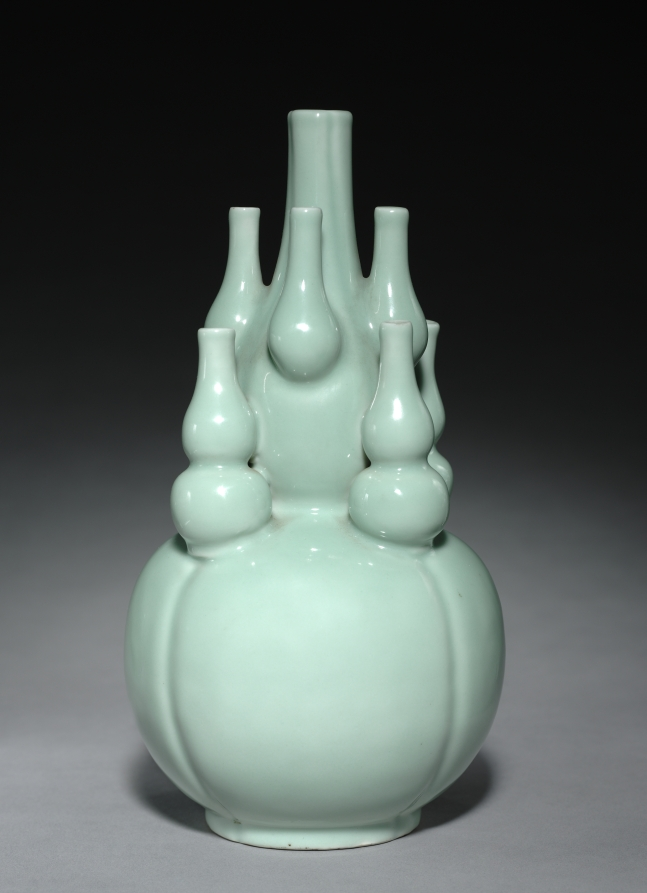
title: Double-gourd Shaped Bottle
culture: China, Qing dynasty (1644–1911), Qianlong mark and reign (1736–95)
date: 1736–95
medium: porcelain with celadon glaze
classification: Ceramic